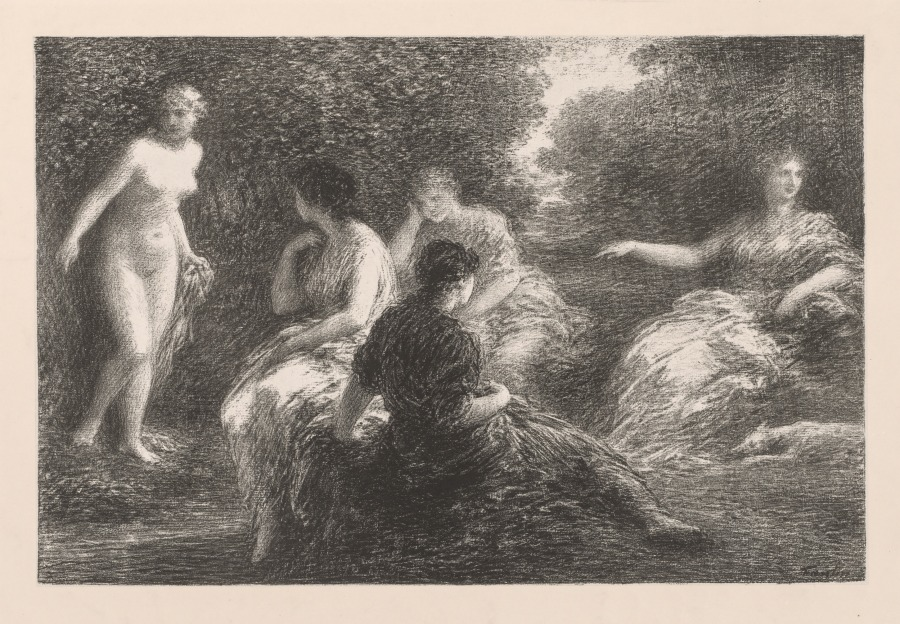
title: The Bathers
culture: France, 19th century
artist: Henri Fantin-Latour (French, 1836–1904)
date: 1896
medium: lithograph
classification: Print